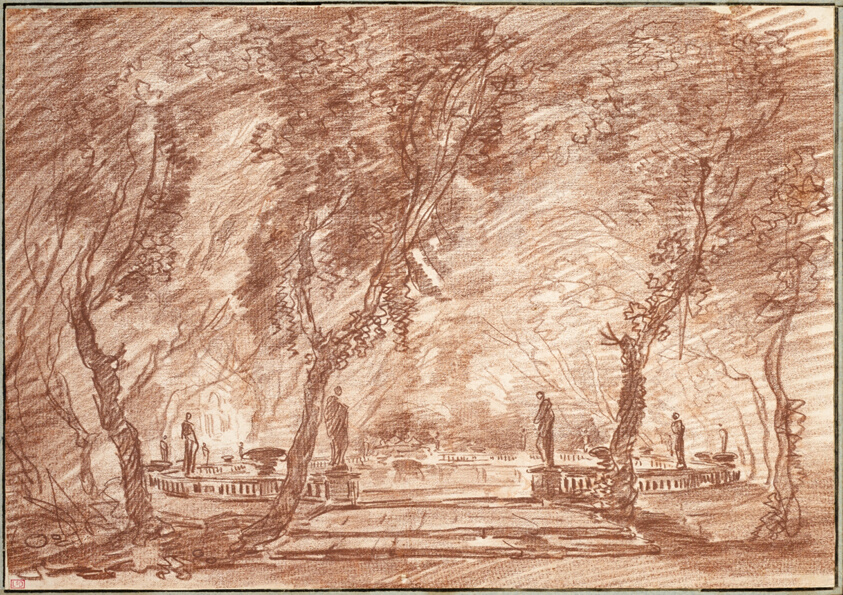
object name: Drawing and Watercolor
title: Fountain in the Park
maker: Hubert Robert (French, 1733-1808)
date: c. 1765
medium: Red chalk, on off-white laid paper, laid down on cream laid paper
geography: France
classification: chalk; drawings (visual works); prints and drawing